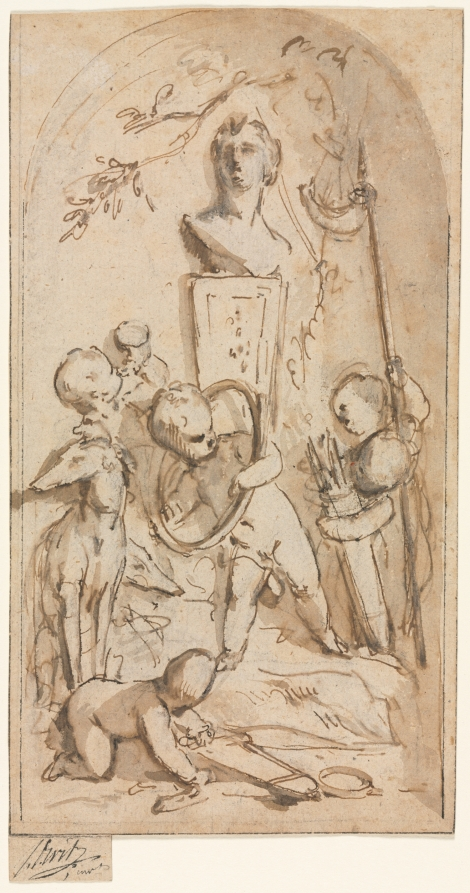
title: Bust of Diana with Putti and Hunting Attributes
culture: Netherlands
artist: Jacob de Wit (Dutch, 1695–1754)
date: 1700–1750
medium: pen and brown ink and brush and brown wash over black chalk, heightened with white; framing lines in black and brown ink over graphite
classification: Drawing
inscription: signed, lower left, in black ink: J. d. Wit / invt